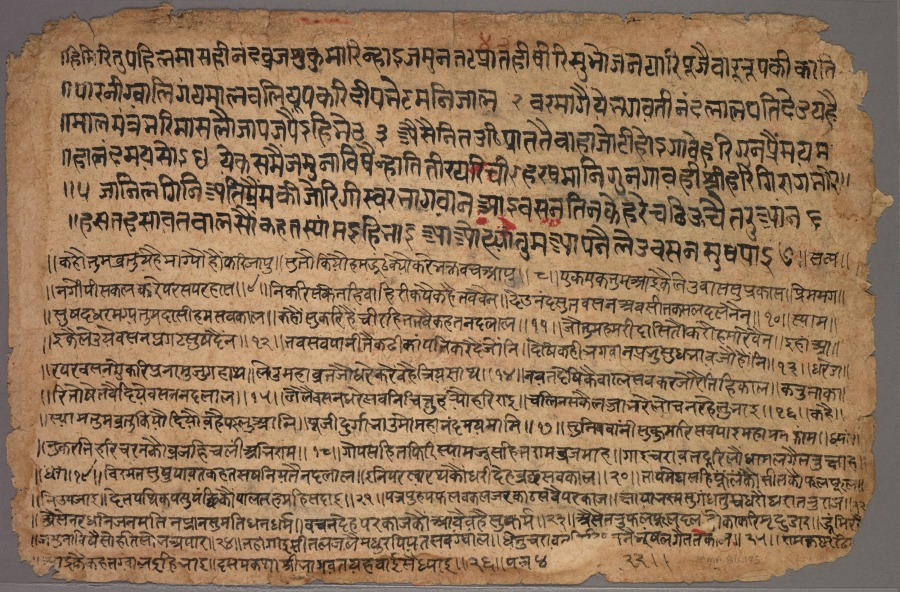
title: Krishna Steals the Clothes of the Milkmaids and Expounds on the Virtue of Trees, from a Braj Bhagavata Purana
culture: Central India, Madhya Pradesh, Malwa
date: c. 1650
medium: Gum tempera on paper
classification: Painting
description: When the milkmaids went to the Yamuna River to bathe, Krishna stealthily took their clothes and hid them in the treetops. Here, the blue-skinned Krishna sits in a tree playing his flute, waiting for the women to come to him. True devotees must shed all worldly inhibitions and approach their god with nothing to hide. The narrow register above shows Krishna expounding on the virtue of trees to the other cowherds. The illustration closely follows the extensive text, written on the back in the vernacular language of Braj, even down to the detail of how they drank the sweet water of the Yamuna River.